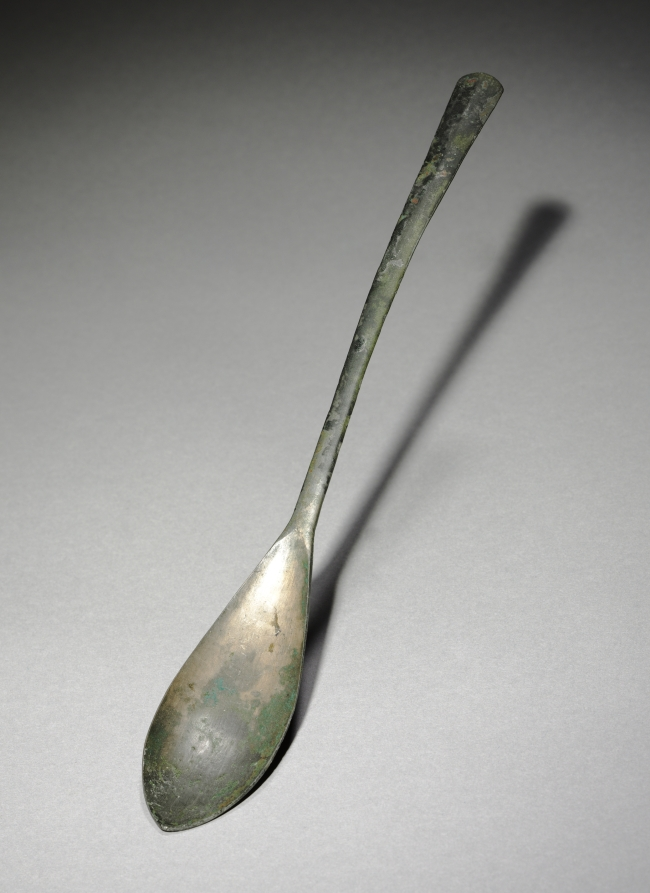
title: Spoon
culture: Korea, Goryeo dynasty (918–1392)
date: 918–1392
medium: silver bronze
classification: Metalwork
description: Celadons, spoons, seals, and bronze mirrors were the most common burial objects in tombs during the Goryeo period (918–1392). Furnishing tombs with an elaborate assemblage of objects was believed to honor and comfort the newly dead. Generally, Goryeo tombs were left untouched until the late 19th century. During the colonial period (1910–45), however, Japanese archaeologists hastily excavated the tombs located in Kaeseong, the former capital of the Goryeo period. Scholars recently have proposed that toward the end of the 14th century, Koreans enjoyed meat-based soups more than any other dishes, explaining why many more spoons than chopsticks were buried in tombs.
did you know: Bronze spoons are the most common burial item. Scholars have proposed that toward the end of the 14th century, Koreans enjoyed meat-based soups more than any other dishes, explaining why spoons became common household items as well as burial goods.